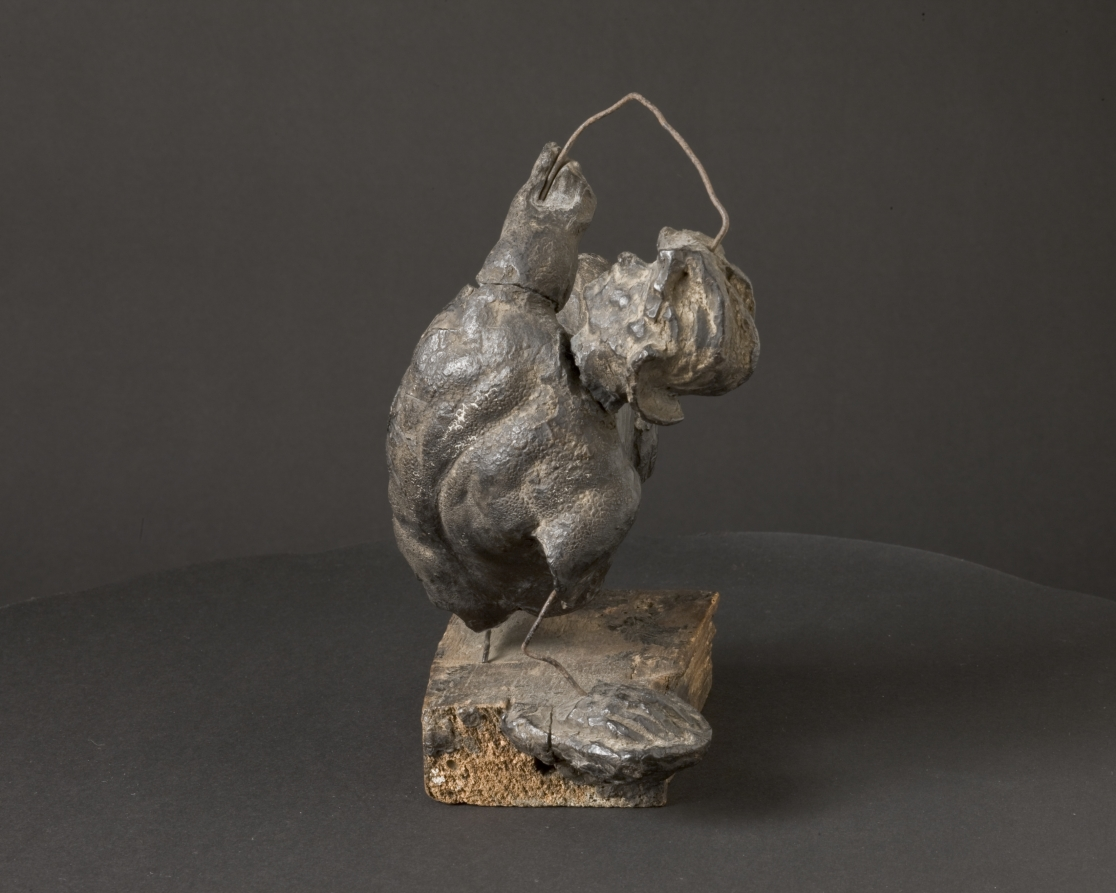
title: Model for a Fallen Warrior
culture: Italy, 16th century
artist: attributed to Giovanni Francesco Rustici (Italian, 1474–1554)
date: c. 1520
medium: wax on a metal armature, mounted on wood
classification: Sculpture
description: Giorgio Vasari (1511–1574), an influential writer and painter, notes in his biography of his contemporary Rustici, that the artist sculpted terracotta battle scenes of groups of horses "with men on their backs or under them." This wax model may be a study for such a group, showing a contorted, helmeted warrior bracing himself after falling to the ground. The figures for these projects were most likely inspired by those in Leonardo's monumental wall painting depicting the Battle of Anghiari for the Hall of the Five Hundred in the Palazzo Vecchio, Florence. Although the fresco was never completed, its pictorial scheme was well known. Rustici later collaborated with Leonardo, and was undoubtedly aware of the major commission and its dynamic portrayal of war.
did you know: Sixteenth-century sculptors often sketched their ideas in three dimensions using wax, clay, or stucco.